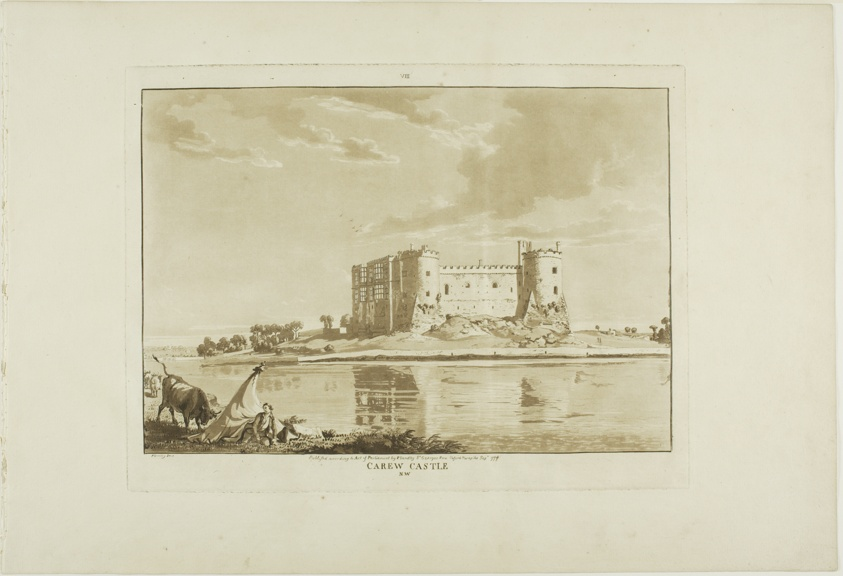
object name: Print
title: Carew Castle, plate eight from Twelve Views in Wales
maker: Paul Sandby (English, 1731-1809)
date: 1777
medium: Aquatint on cream laid paper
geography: England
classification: aquatint; print; prints and drawing